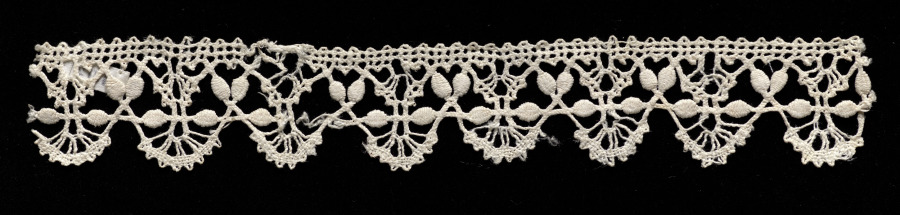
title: Lace Edging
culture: Italy, Genoa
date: 1700s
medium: Bobbin lace (needle lace design)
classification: Lace